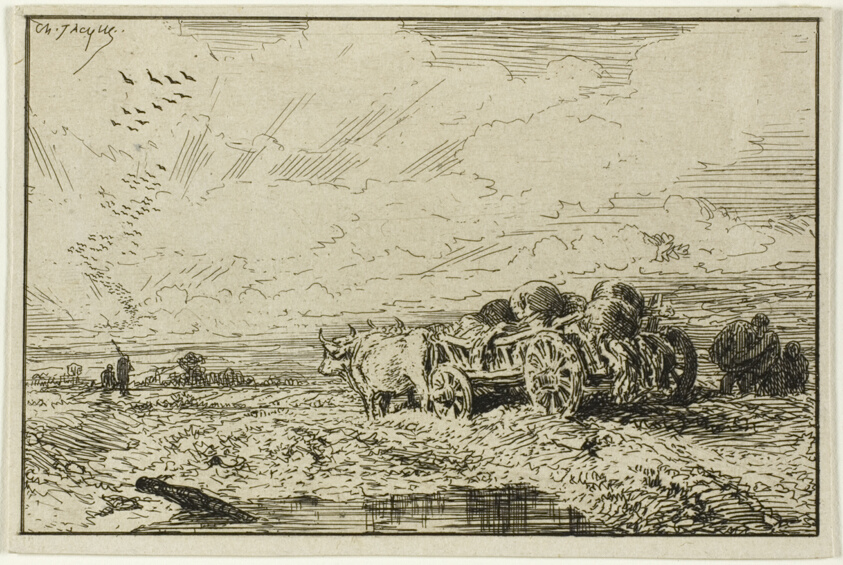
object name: Print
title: Landscape with Ox-Drawn Wagon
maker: Charles Émile Jacque (French, 1813-1894)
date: 1846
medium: Etching on ivory wove paper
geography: France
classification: etching; print; prints and drawing